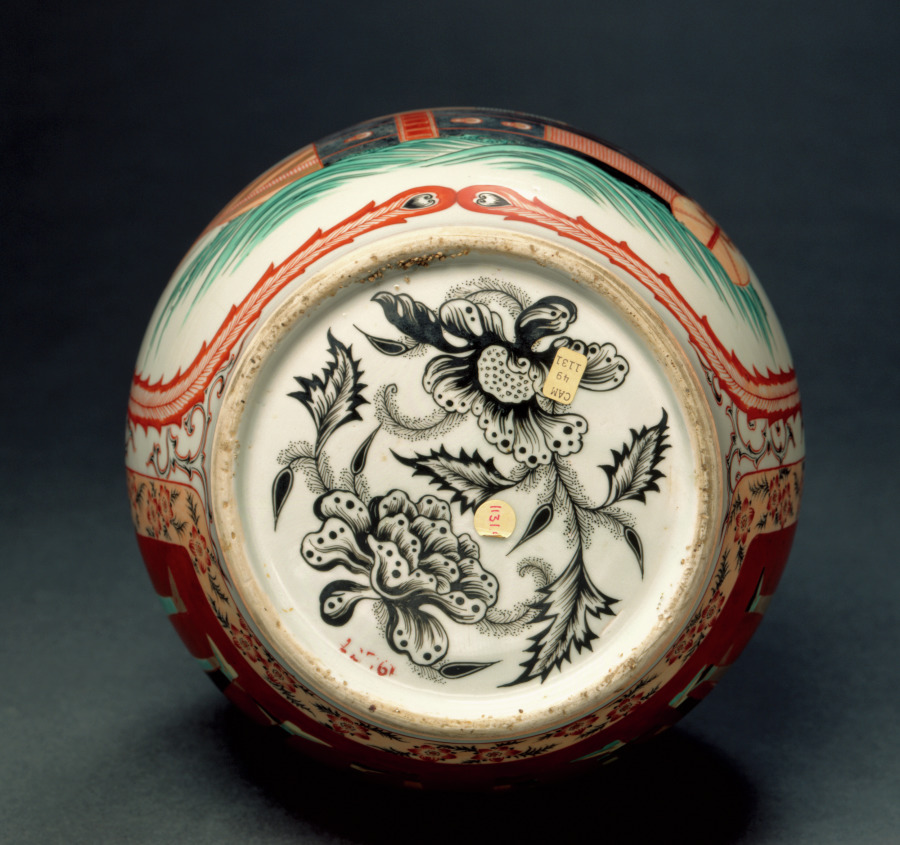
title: Bottle with Western Ships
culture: Japan, Edo period (1615–1868)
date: c. 1800–1868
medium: Porcelain with decoration in colored enamels and underglaze blue, overglaze enamels, and gold (Hizen ware, Arita type)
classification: Ceramic